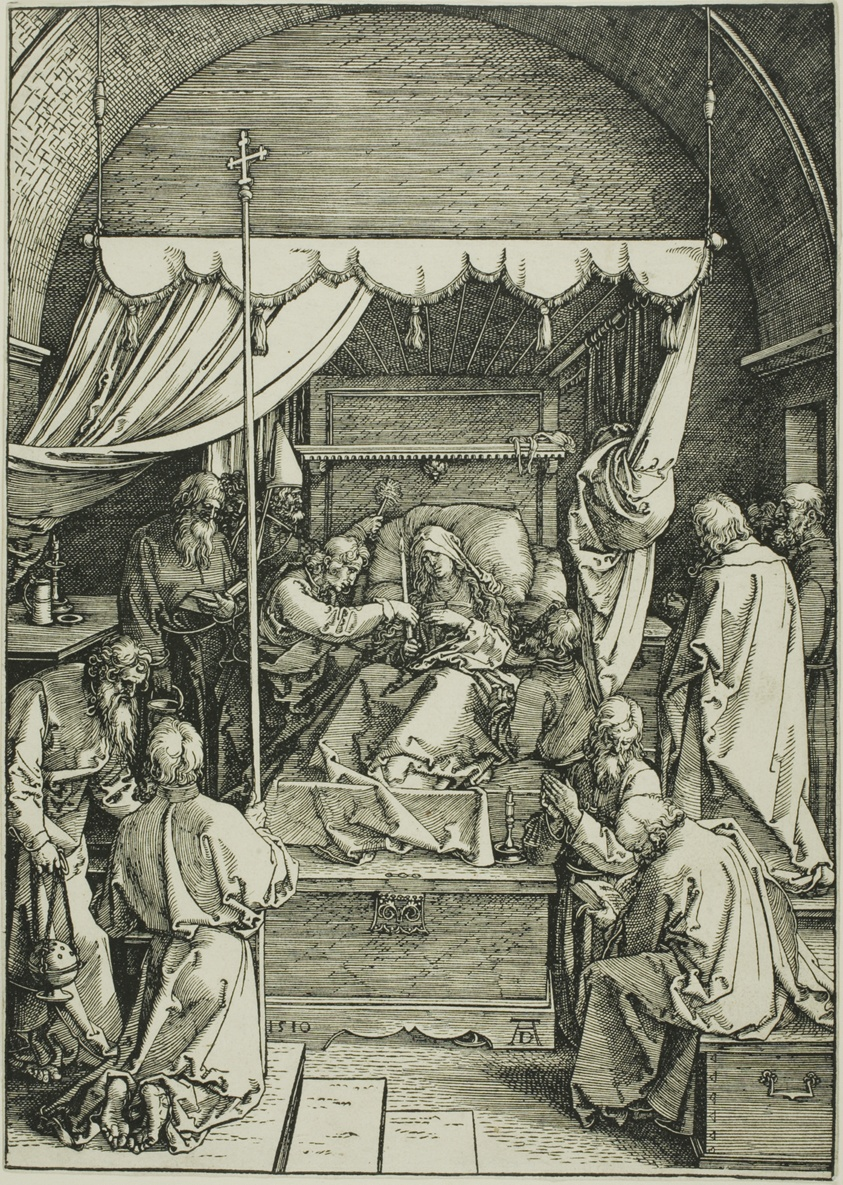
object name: Print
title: The Death of the Virgin, from The Life of the Virgin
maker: Albrecht Dürer (German, 1471-1528)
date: 1510, published 1511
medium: Woodcut in black on ivory laid paper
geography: Germany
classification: woodcut; print; prints and drawing; paper